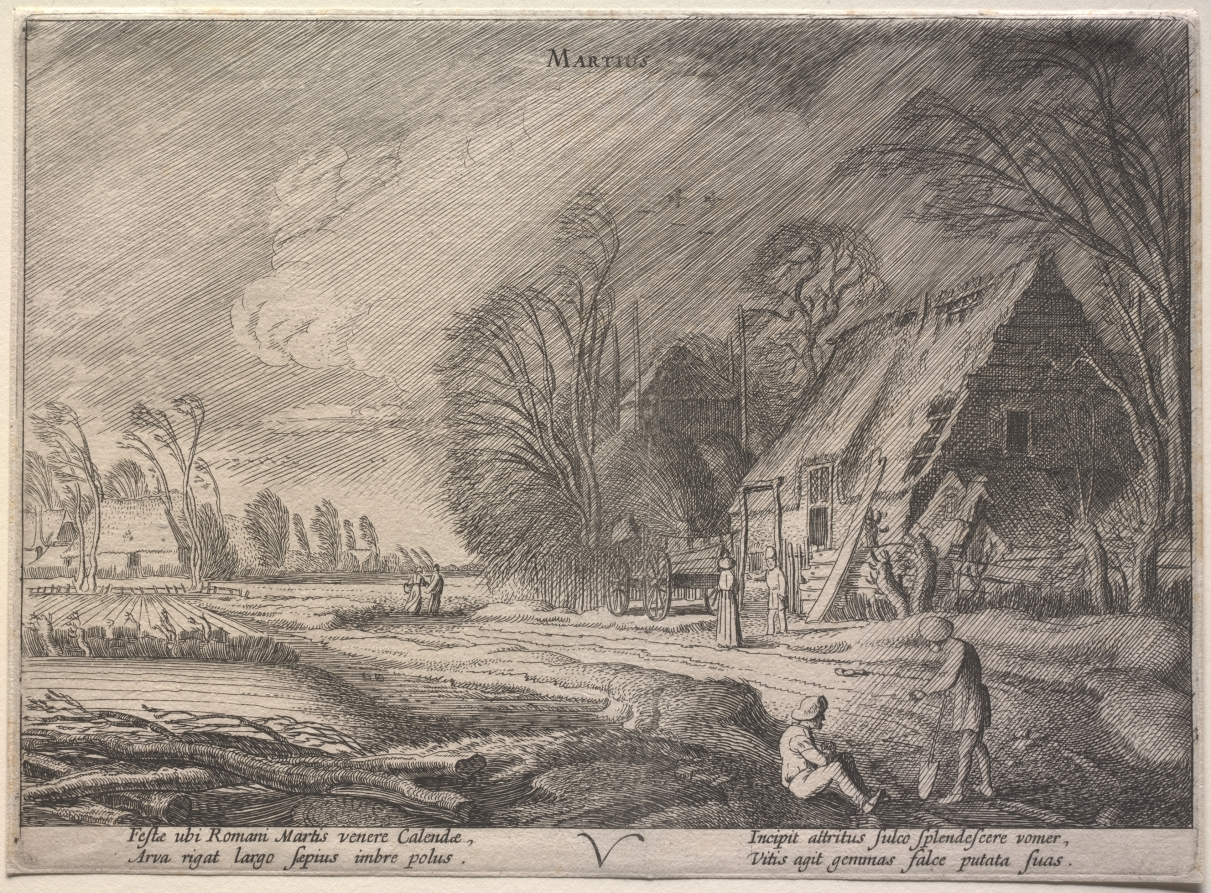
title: The Twelve Months: March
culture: Netherlands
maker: Jan van de Velde II (Dutch, 1593–1641)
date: 1608–18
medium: etching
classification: Print